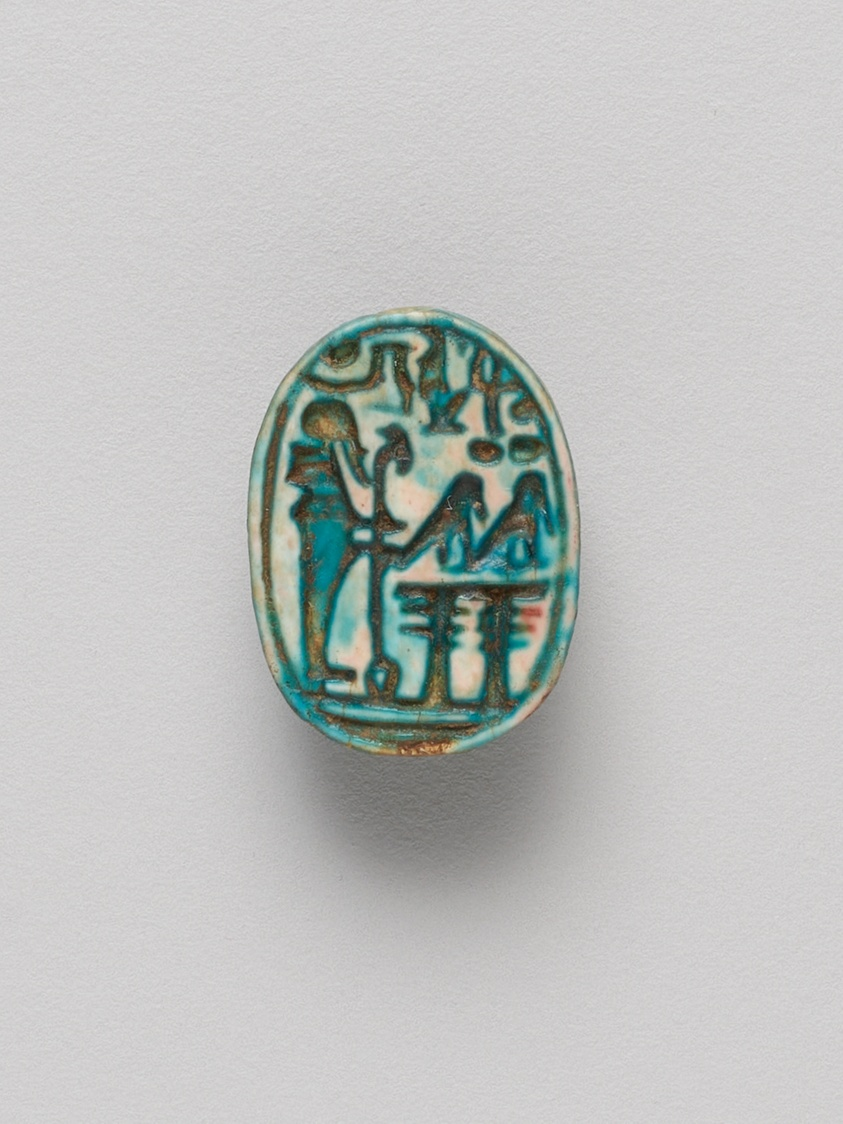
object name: Costume and Accessories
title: Scarab Depicting Ptah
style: new kingdom, ramesside period, ancient, nineteenth dynasty, egyptian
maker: Egyptian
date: New Kingdom, Dynasty 19, Reign of Ramesses II (about 1279–1213 BCE)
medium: Glazed steatite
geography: Egypt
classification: scarab; ancient art; costume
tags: scarab beetle, pharaohs, kings, king, Hieroglyphs, gods (deities), deities